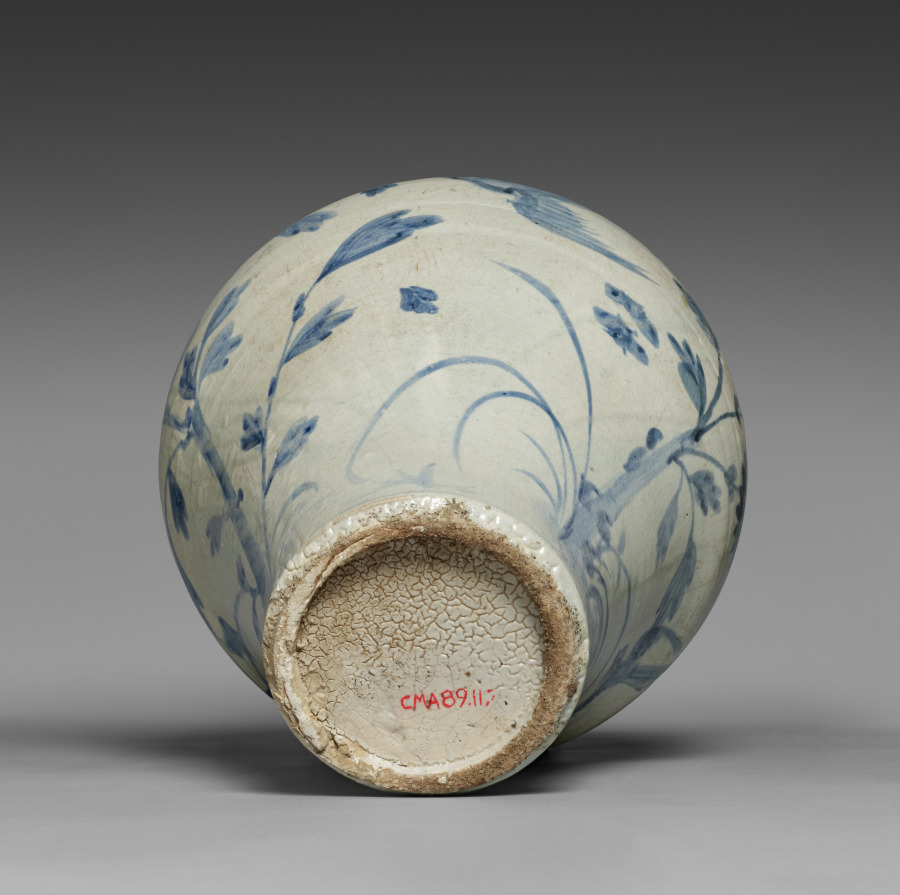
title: Vase with Bird and Flower Design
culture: Korea, Joseon dynasty (1392–1910)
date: late 1800s–early 1900s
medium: porcelain with underglaze blue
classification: Ceramic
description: This vase with broad shoulders and a tall neck represents a typical style of 19th-century blue-and-white porcelain. Unlike earlier examples decorated mainly with literati themes that evoke neo-Confucian moral values—plum blossoms (purity), orchids (grace), bamboo (integrity), and chrysanthemums (loftiness)—porcelain works of the 1800s feature fully bloomed peonies and a pair of playful birds, symbols of wealth and familial harmony.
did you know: Nineteenth-century Korean blue-and-white porcelains tend to feature broad shoulders and a tall neck.